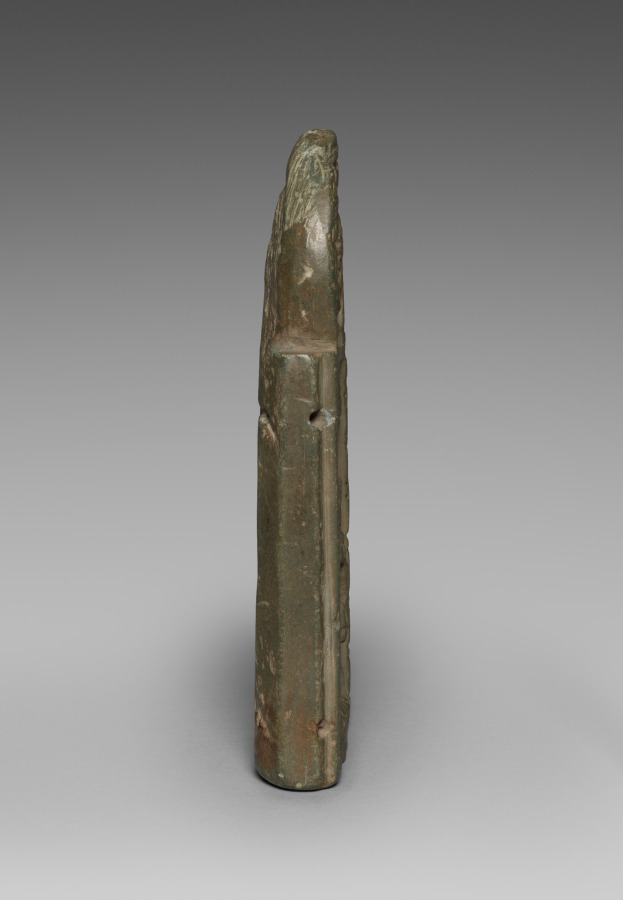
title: Section from a Portable Shrine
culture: Pakistan, Gandhara, Kushan period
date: 100s CE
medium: gray schist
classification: Sculpture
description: Figures of deities who protect children are featured in this relief carving. A form of Skanda holding a bird and a flower stands next to a regal yakshi with pointed rodent or elephant ears. A diminutive figure who may be a child is shown kneeling at his feet. Above, the six-headed mother goddess Shashthi sits next to Skanda, holding the spear.